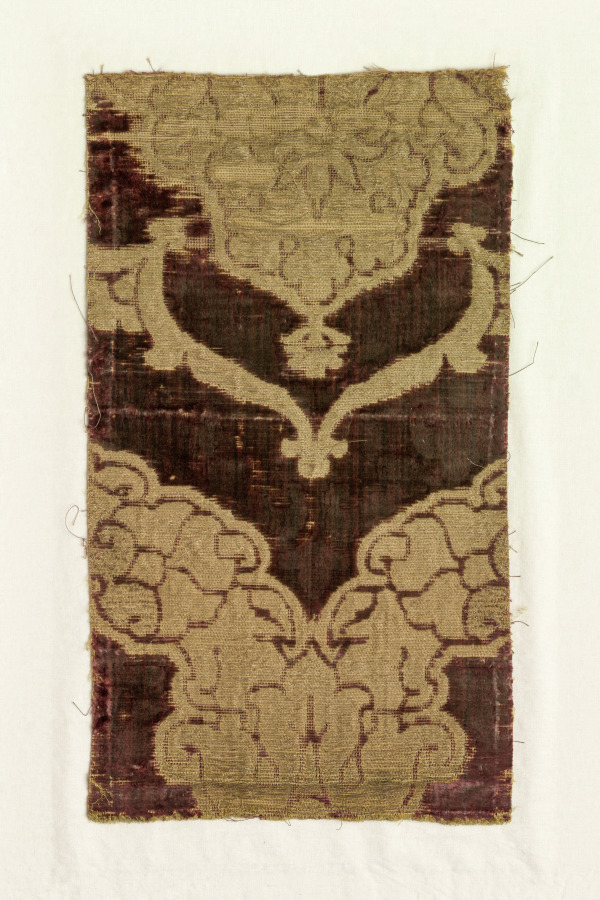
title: Fragments from Chasuble Front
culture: Italy, early 16th century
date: early 1500s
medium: velvet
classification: Velvet